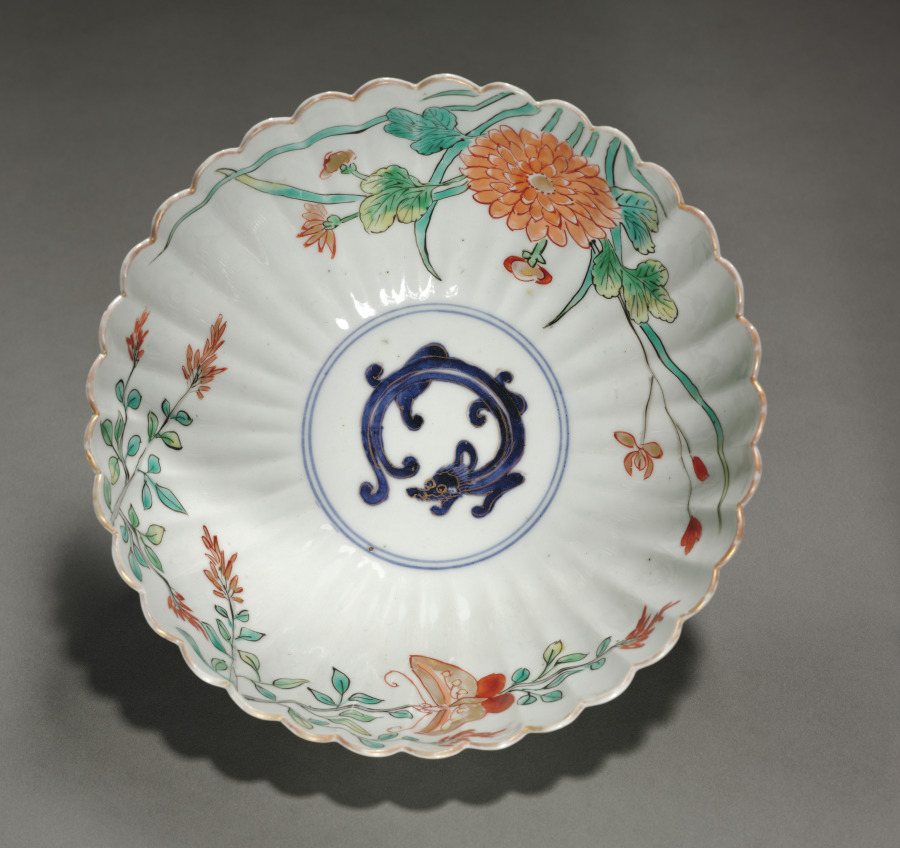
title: Fluted Bowl with Dragon, Butterfly, and Flowers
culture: Japan, Edo period (1615–1868)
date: early 1700s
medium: Porcelain with underglaze blue and overglaze color enamels and gold (Hizen ware, Kakiemon type)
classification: Ceramic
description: A dragon encircled by sprays of flowers and a butterfly enliven the interior of this fluted bowl. The exterior has similar decoration, with touches of gold on some petals. The flutes enhance both the visual and tactile experience; their tapered forms draw the eye from the edges inward and provide ridges for the hands.